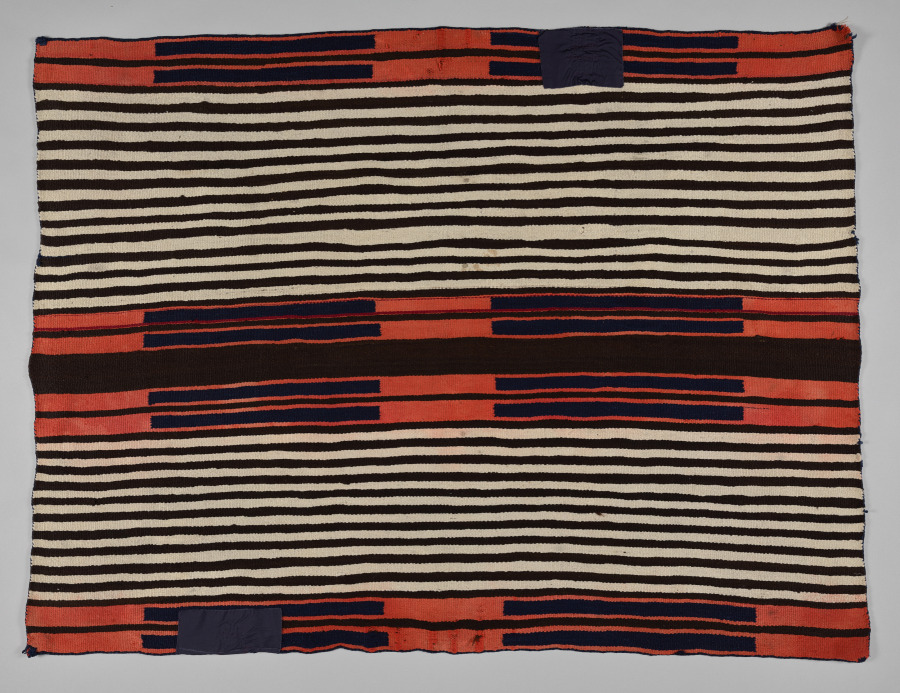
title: Wearing Blanket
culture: America, Native North American, Southwest, Navajo (Dine), female artist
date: c. 1875–80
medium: Wool (handspun, Germantown, and bayeta): tapestry weave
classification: Textile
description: Diné (Navajo) artists wove geometric designs that reference the natural environment as well as embody spiritual insights and meanings. Specific patterns were inherited but also evolved over time. This blanket was created during the late 1800s, when weavers in the Southwest began to shift from making garments for Indigenous use, including trade, to additionally create items for non-Native collectors. In this new market, traditional wearing blankets, which were worn around the shoulders, were purchased as rugs.